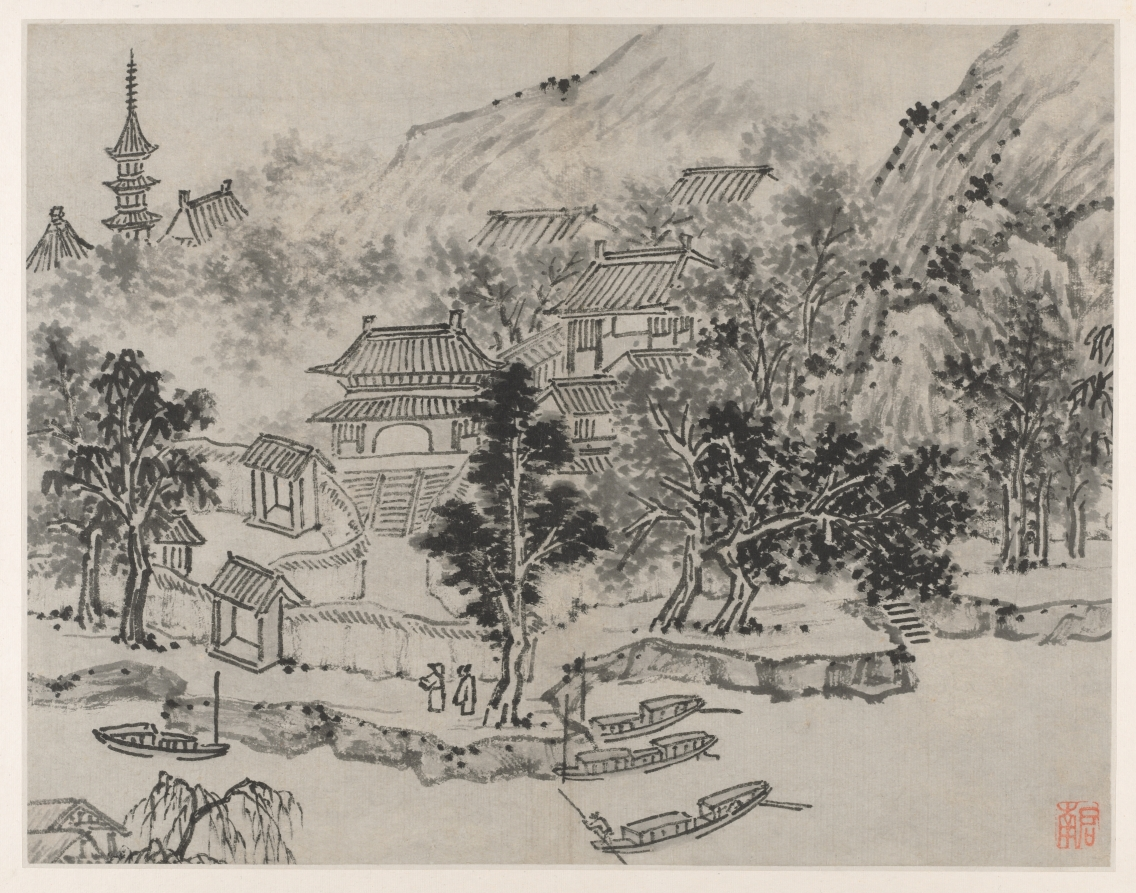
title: Distant View of Tiger Hill from the Canal Mooring, from Twelve Views of Tiger Hill, Suzhou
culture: China, Ming dynasty (1368–1644)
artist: Shen Zhou (Chinese, 1427–1509)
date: after 1490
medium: Album leaf; ink on paper or ink and slight color on paper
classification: Painting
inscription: [印] 启南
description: Views of Tiger Hill depicts a historic site a few miles northwest of Suzhou. The scenes simulate a visit from arriving by boat at the foot of the mountain to climbing to Cloudy Cliff Monastery. Representations of the artist’s mature style, Shen Zhou included views in subtle colors in the suite of monochrome scenes. A Suzhou native, Shen Zhou was supported by family wealth and rejected an official career in favor of life as a retired scholar. Turning to painting in midlife, he is regarded as the founder of the Wu School of painting, with its center in Suzhou.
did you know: Here Shen Zhou depicted the view from the canal toward the Pagoda of the Cloudy Cliff Monastery, seen from afar. The history of Tiger Hill can be traced to the State of Wu (about 5th century BCE).